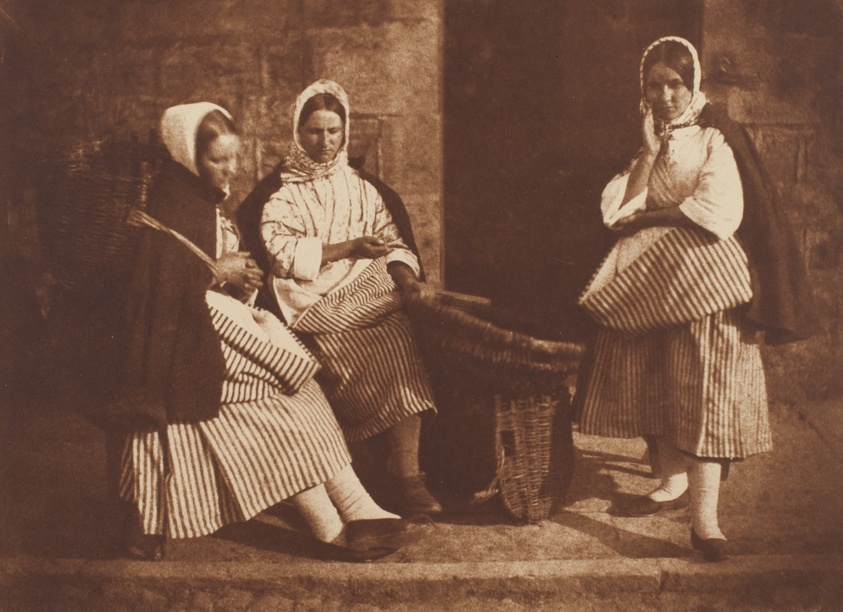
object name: Photograph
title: Mrs. Logan and Two Unknown Women, Newhaven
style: 19th century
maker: David Octavius Hill (Scottish, 1802–1870) and; Robert Adamson (Scottish, 1821–1848)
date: 1843/47, printed c. 1916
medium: Carbon print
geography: Scotland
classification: photograph; carbon print; photography